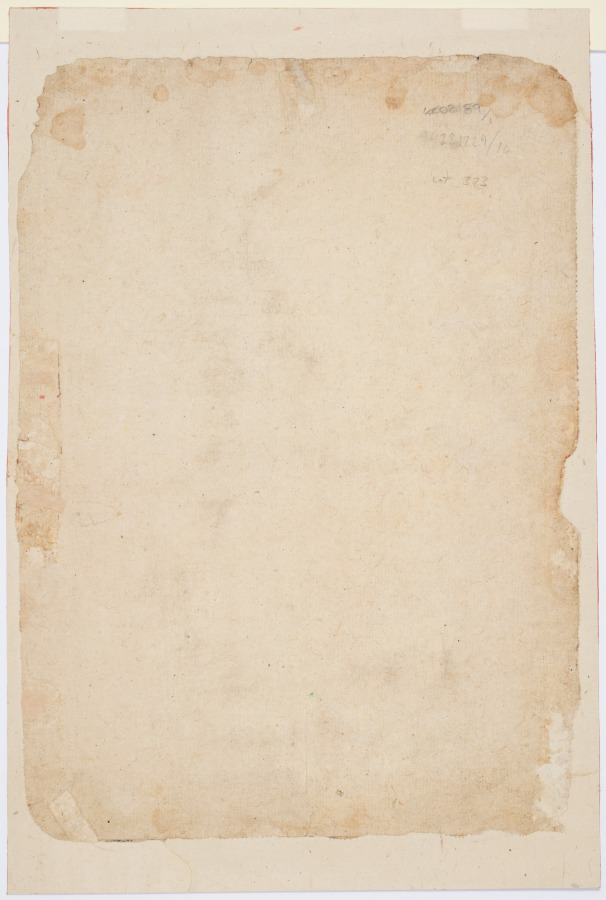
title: Maharana Ari Singh II of Mewar (r. 1761–73) with His Consort on a Terrace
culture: Northwestern India, Rajasthan, Rajput Kingdom of Mewar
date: c. 1761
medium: Gum tempera and gold on paper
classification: Painting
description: The ruler with his golden nimbus strolls with his beloved hand-in-hand on a white marble terrace. Soon, the couple will have enjoyed the hookah on the carpet and the raja will have laid down his sword and shield and retired with his consort to the golden chamber and drawn the curtains for privacy. The chamber sits at a precarious tilt, suggesting vigorous love-play within.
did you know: The garden below is full of row upon row of red poppies, suggesting the intoxicating heat of summer and the pleasures of opium.